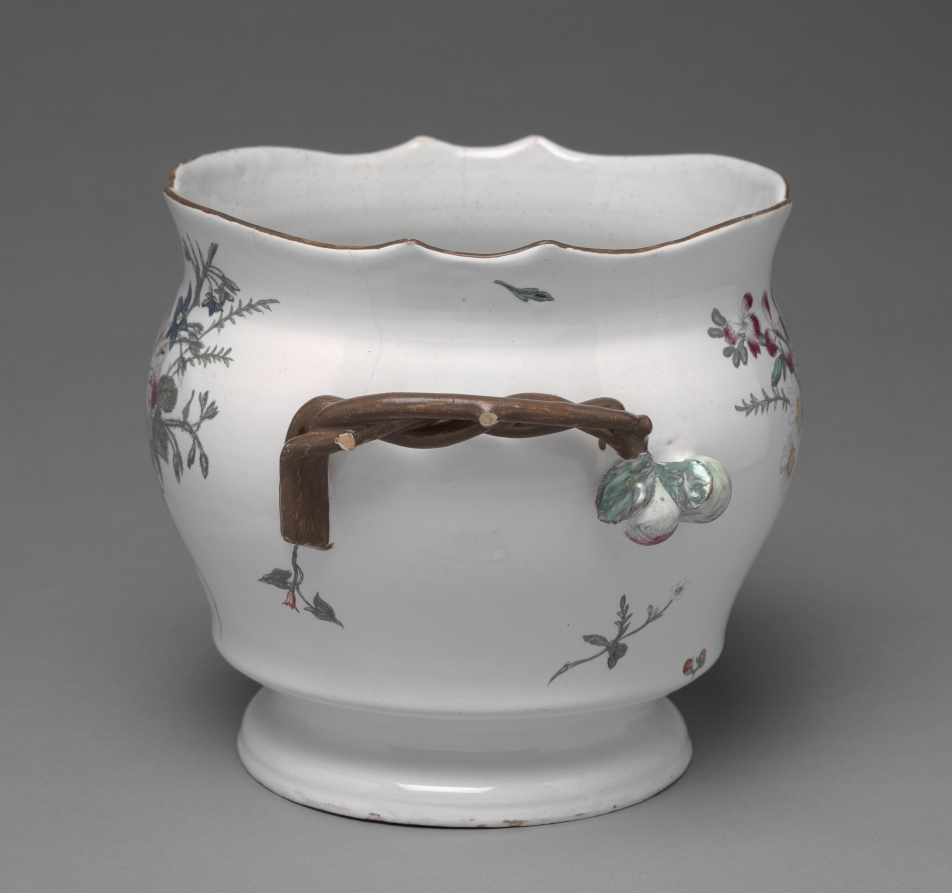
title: Wine Cooler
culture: France, Marseilles, 18th century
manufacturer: Joesph- Gaspard Robert Factory (French)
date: c. 1760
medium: tin-glazed earthenware (faience) with enamel decoration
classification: Ceramic